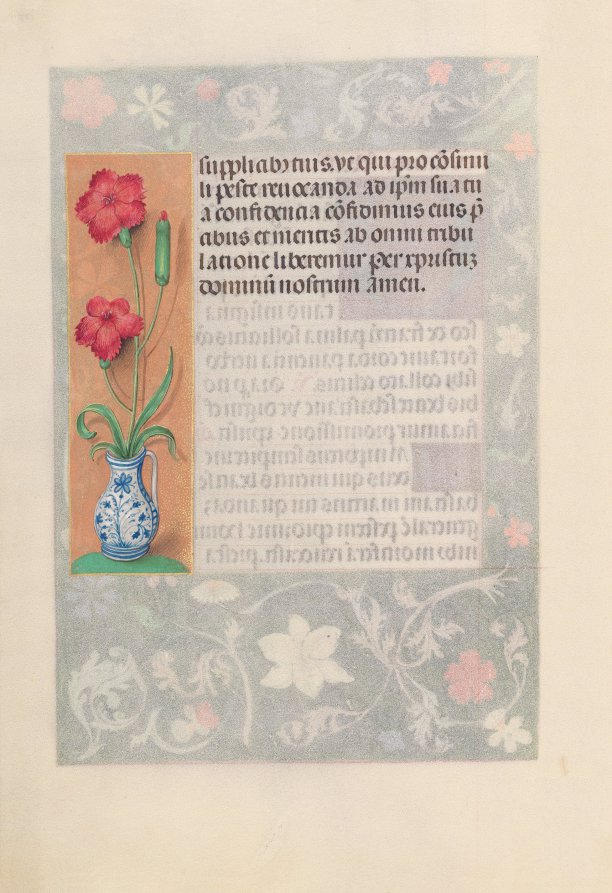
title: Hours of Queen Isabella the Catholic, Queen of Spain: Fol. 178v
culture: Flanders, Ghent and Bruges, late 15th century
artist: Master of the First Prayerbook of Maximillian (Flemish, c. 1444–1519)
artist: and Associates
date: c. 1500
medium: ink, tempera, and gold on vellum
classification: Bound Volume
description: This manuscript was illuminated by a circle of at least five highly organized manuscript painters active in the Flemish cities of Ghent and Bruges. The principal illuminator was Alexander Bening, who painted the majority of the book's miniatures. Manuscripts produced by this circle of artists are renowned for the decoration of their borders, which typically feature a rich variety of realistically-painted flowers, birds, and butterflies. This prayer book, called a book of hours, was intended not for a cleric, but for the private devotions of a lay person-in this case, Isabella the Catholic, Queen of Spain (1451-1504). Isabella's coat of arms embellishes the book's frontispiece. It is unlikely that the book was commissioned by the Queen herself; rather, she probably received it as a diplomatic gift from someone courting her patronage, perhaps Cardinal Francisco Jimenez de Cisneros. A Franciscan friar, Jimenez was dependent upon Isabella for his advancement, first to the post of Queen's confessor in 1492, and then to Archbishop of Toledo in 1495.